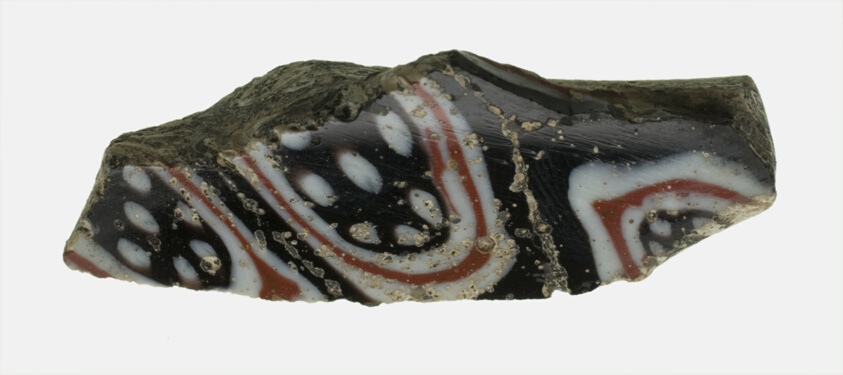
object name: Decorative Arts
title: Fragment of a Plate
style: roman (ancient, style or period), ancient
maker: Roman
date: 1st century BCE–1st century CE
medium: Glass, mosaic glass technique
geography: Roman Empire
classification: fragment; decorative arts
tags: decoration